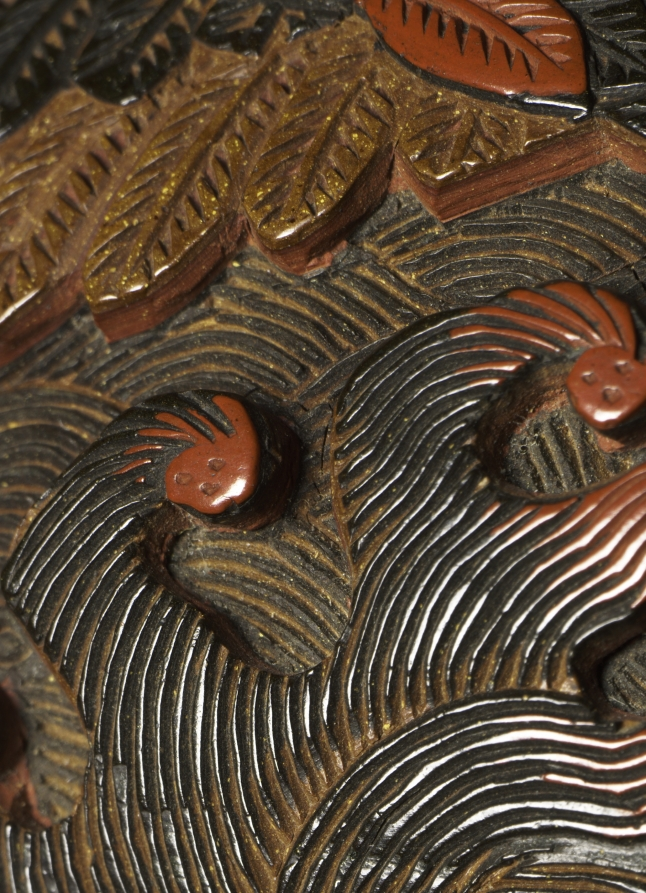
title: Jar with Dragon and Phoenix Design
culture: China, Jiangxi province, Jingdezhen, Ming dynasty (1368-1644), Jiajing mark and reign (1522-66)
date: 1522–66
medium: carved lacquer in cinnabar and other colors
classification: Lacquer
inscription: 大明嘉靖年製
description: A phoenix and dragon alternating with two auspicious ornate characters—“fortune” 福（fu) and “longevity” 壽 (shou)—adorn this exquisitely carved lacquer jar. Similar to contemporary five-color (wucai) decoration on porcelain, this jar shows layers of lacquer in black, ochre, green, and cinnabar (red). In a time-consuming process, a multitude of lacquer coatings were applied to the wooden core before its design could be carved into the surface. The phoenix and dragon are imperial emblems suggesting that this jar was made for the court. The base of the jar is inscribed: “Made in the Jiajing-era of the Great Ming [dynasty].”